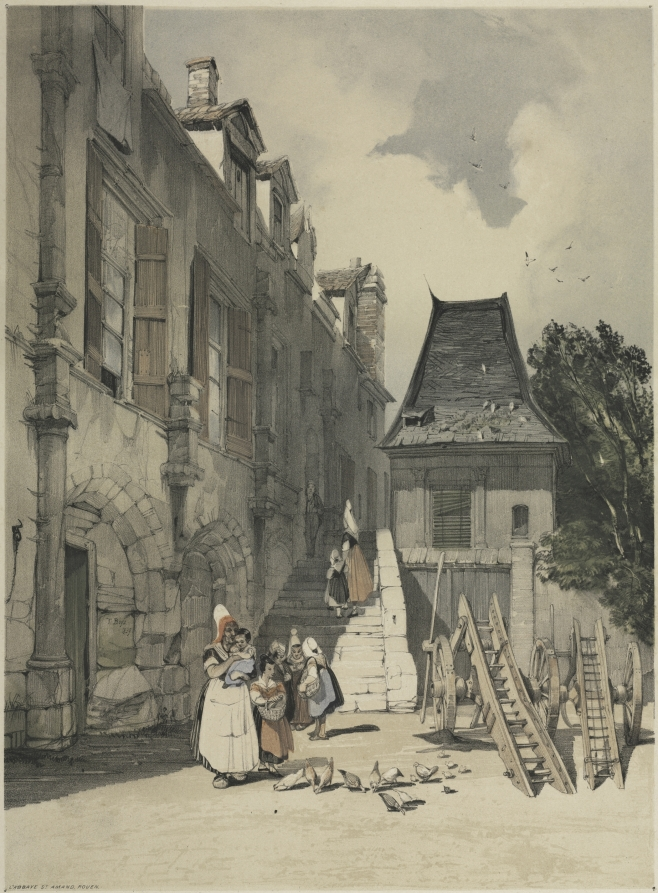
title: L'Abbaye St. Amand, Rouen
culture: England, 19th century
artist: Thomas Shotter Boys (British, 1803–1874)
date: 1839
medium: lithograph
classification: Print